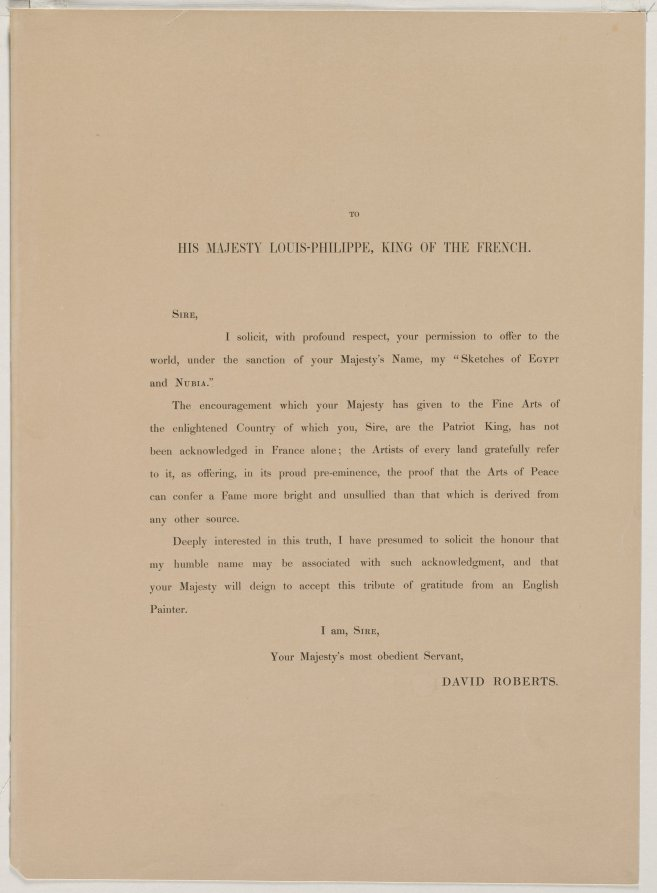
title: Egypt and Nubia, Volume I: Dedication Page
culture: England, 19th century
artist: Louis Haghe (British, 1806–1885)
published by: F. G. Moon, 20 Threadneedle Street, London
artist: after David Roberts (Scottish, 1796–1864)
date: 1846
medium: letterpress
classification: Print